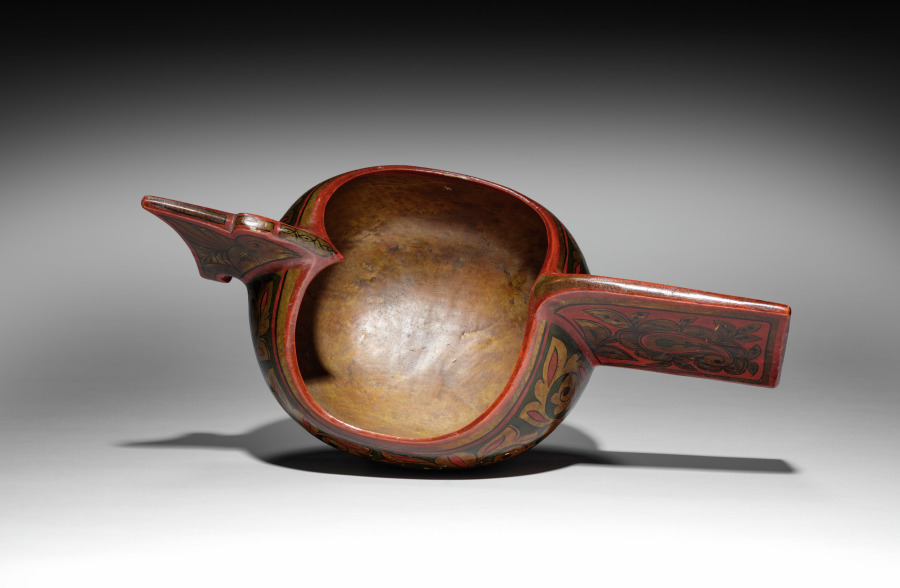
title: Wedding Cup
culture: Russia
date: before 1949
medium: lacquer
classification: Lacquer